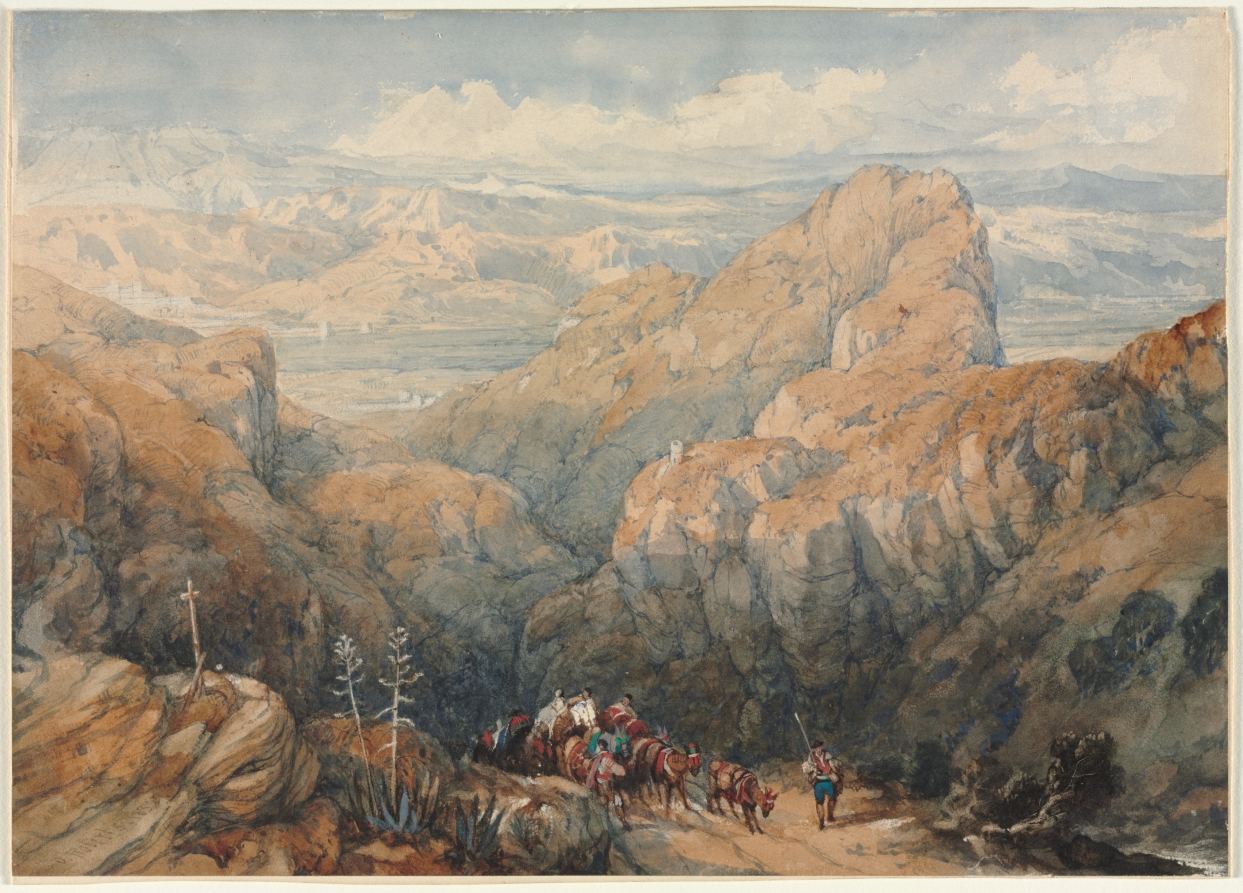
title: Descent into the Plain of Granada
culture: England, 19th century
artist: David Roberts (Scottish, 1796–1864)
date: 1834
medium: watercolor with gouache, scratch-away, and graphite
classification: Drawing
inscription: signed and dated, in brown watercolor, at lower left: D. Roberts 1834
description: Later celebrated for his topographical landscapes of the Middle East, David Roberts’s first extended trip abroad was in 1832 when he traveled through France to Spain over a period of 10 months. This watercolor records a scene from Roberts’s journey from Madrid to Andalusia. He described the trip in a letter to his sister: "I jogged on a considerable part of the way on foot, happy and contented. Granada is in the most beautiful situation that can be imagined. It lies at the foot of a ridge of high mountains, called the Sierra Nevada, or the Mountains of Snow." Replete with burdened mules, a lone figure on foot, and sun-drenched mountains with a view of Granada in the distance, this watercolor vividly illustrates the artist’s recollections.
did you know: This drawing was reproduced as a wood engraving in Roscoe's first volume, The Tourist in Spain: Granada.